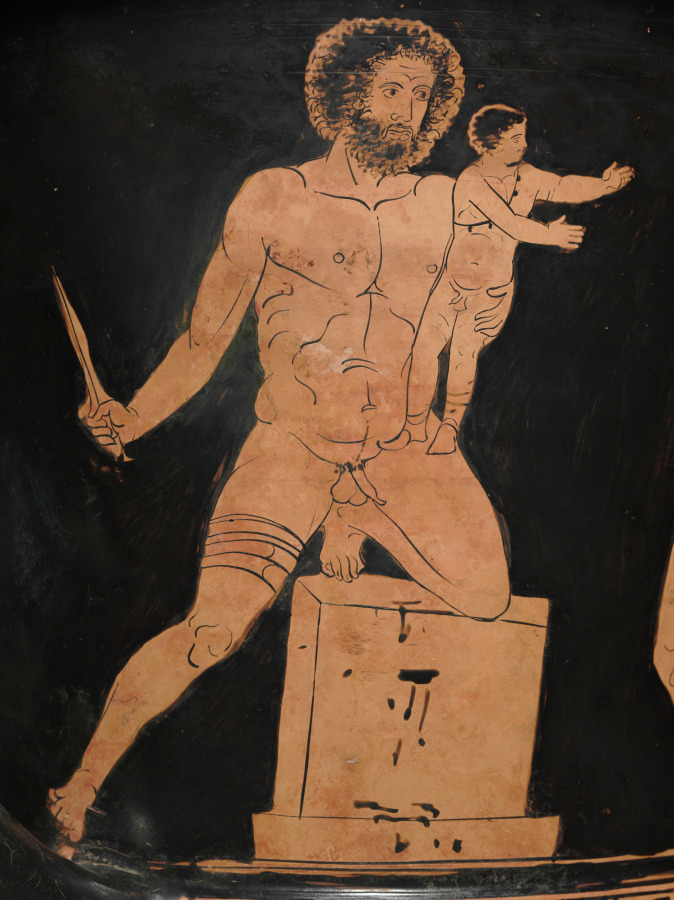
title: Red-Figure Calyx-Krater (Mixing Vessel): Medea in Chariot (A); Telephos with Baby Orestes (B)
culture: South Italian, Lucanian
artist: near the Policoro Painter (South Italian, Lucanian, active c. 400 BCE)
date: c. 400 BCE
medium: ceramic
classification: Ceramic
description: The remarkable scene on the front of this vase relates to the famous tragedy Medea, written by Euripides and first produced in Athens in 431 BC. Framed in the center by a halo (recalling her sun god grandfather Helios), the sorceress Medea flies off in a dragon-drawn chariot. Seeking revenge against her husband Jason, leader of the Argonauts, Medea has just slain their two children. Two Furies flank her, while Jason and a distraught nurse and teacher approach the bodies on the altar below. A different tragedy unfolds on the other side of the vase, from Euripides’s Telephos (438 BC). The wounded warrior Telephos holds the baby Orestes hostage at an altar, with Agamemnon and Clytemnestra rushing to save their son.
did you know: This vase includes scenes connected to two Athenian tragedies dealing with children—Medea and Telephos.